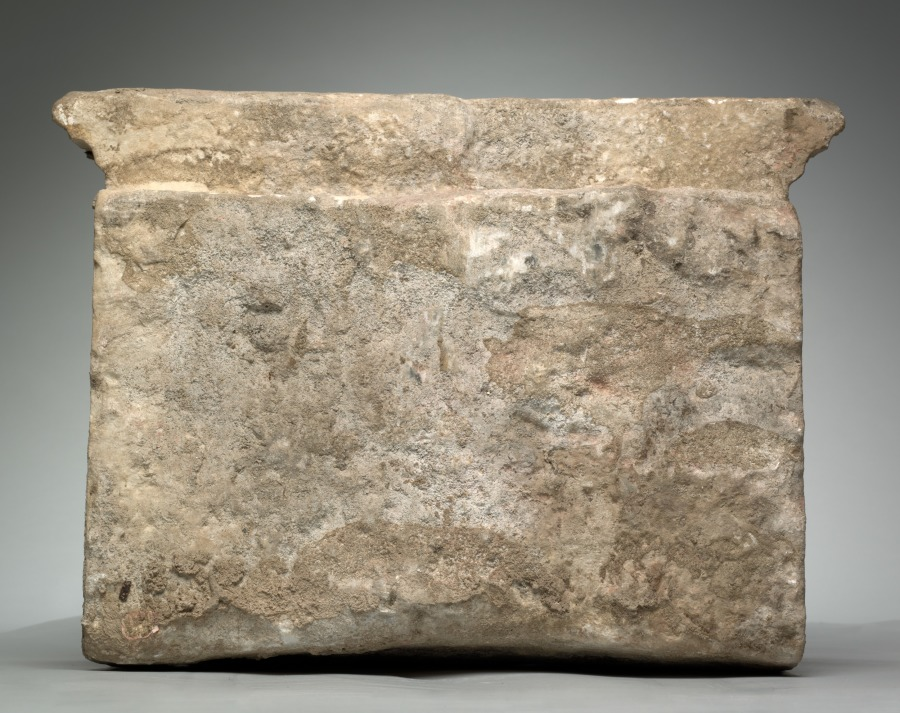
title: Engaged Capital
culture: Southern France, Abbey of Larreule, near Tarbes, 15th century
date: 1400s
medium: limestone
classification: Sculpture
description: This capital belongs to a surviving group including other architectural fragments that once decorated the cloister of the Abbey of Larreule. A cloister was a covered walkway or arcade, usually around all four sides of a square area of grass (the "cloister garth"). The seclusion of the cloister was the monks’ exclusive domain, off limits to others. Here, the monks were supposed to pray, study, meditate, and exercise in privacy and solitude. Such cloister capitals served both to instruct the monks and as a focus for their devotions. Other capitals in this series are installed in the Jardin Massey at Tarbes, near the original abbey. An arch from Larreule has been assembled with other associated French capitals at The Cloisters in New York.